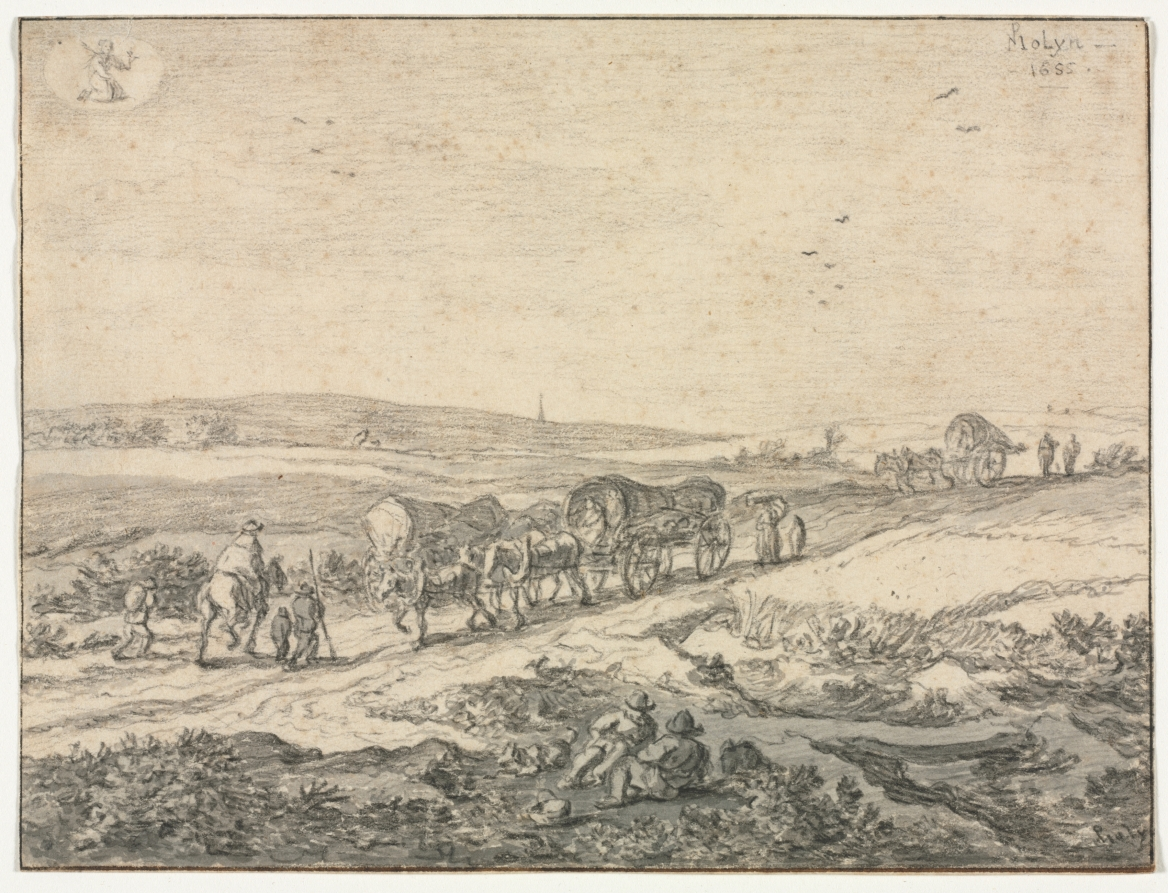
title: August: Landscape with Wagons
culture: Netherlands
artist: Pieter Molyn (Dutch, 1595–1661)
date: c.1655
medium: black chalk and brush and gray wash over traces of graphite; framing lines in brown ink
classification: Drawing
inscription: [signed?], upper right, in black chalk: PMoLyn.[P and M in ligature] - / 1655 - [underlined] ; [signed?], lower right, in black chalk: PMoly [Pand M in ligature] ; VERSO, lower left, in brown ink: Aùgùstÿ ; lower left, in graphite: 43. ; lower left, in graphite: /250..-- ; lower center, in graphite: A5072